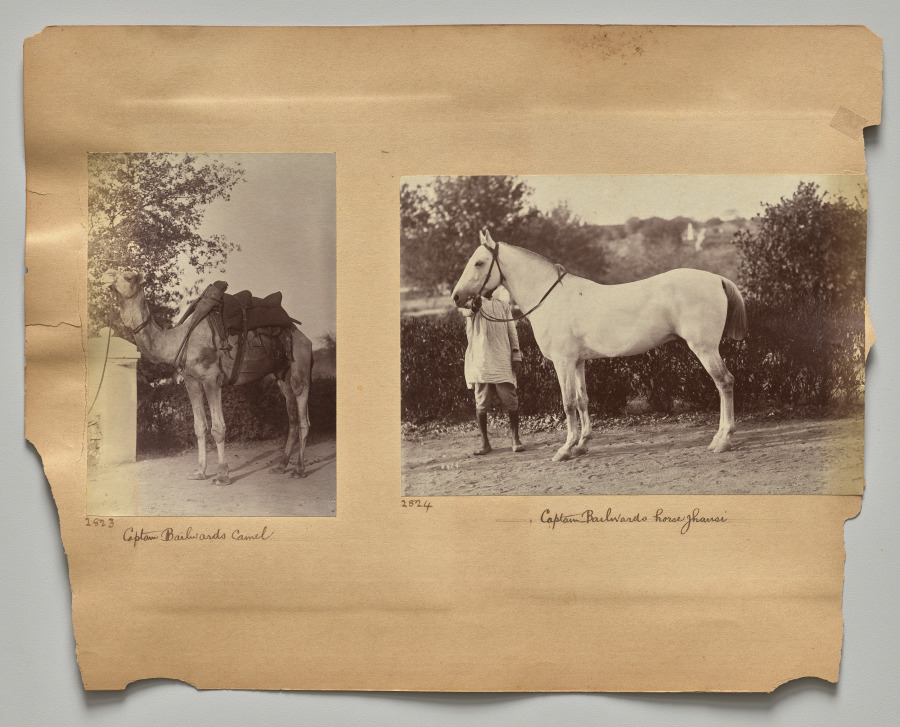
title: Captain Bailward's camel (verso, left)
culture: India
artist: Raja Deen Dayal (Indian, 1844–1905)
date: c. 1882–87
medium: albumen print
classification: Photograph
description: These photographs are part of an album, now disassembled, of around 105 photographs taken in India between 1885 and summer 1887 that provide glimpses into the lives of the British colonial elite and royal and upper-class Indians. The museum holds another group of 37 pictures from this album (2016.266), which was probably commissioned by a British civil servant visiting or working in India around 1888 as a personal souvenir of his experiences there.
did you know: Raja Deen Dayal is regarded now, and was considered during his lifetime, to be India’s most important 19th-century photographer.